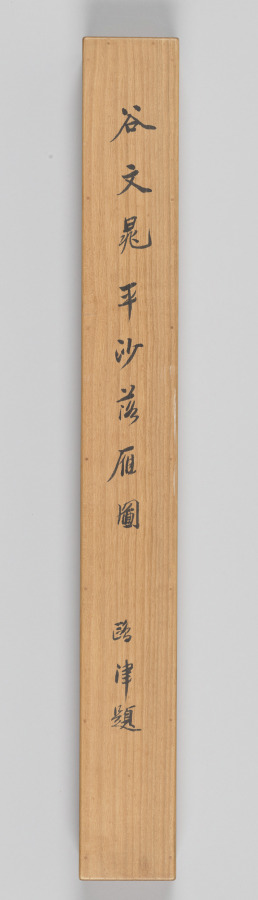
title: Wild Geese Descending on a Sandbar, from Eight Views of Xiao-Xiang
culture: Japan, Edo period (1615–1868)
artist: Tani Bunchō (Japanese, 1763–1841)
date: 1788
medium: album leaf remounted as a hanging scroll; ink and color on paper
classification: Painting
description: This painting was part of a set of album leaves representing the Eight Views of Xiao-Xiang, a theme originating in Chinese poetry and painting that spread to both Korea and Japan. Southern China’s Xiao-Xiang area, where the mist-covered banks of the Xiang River created a complex landscape shifting like the moods and minds of people, captured the imaginations of generations of painters and calligraphers. Inscriptions on these works suggest that they were possibly ordered by newly prominent Japanese Confucian scholars.